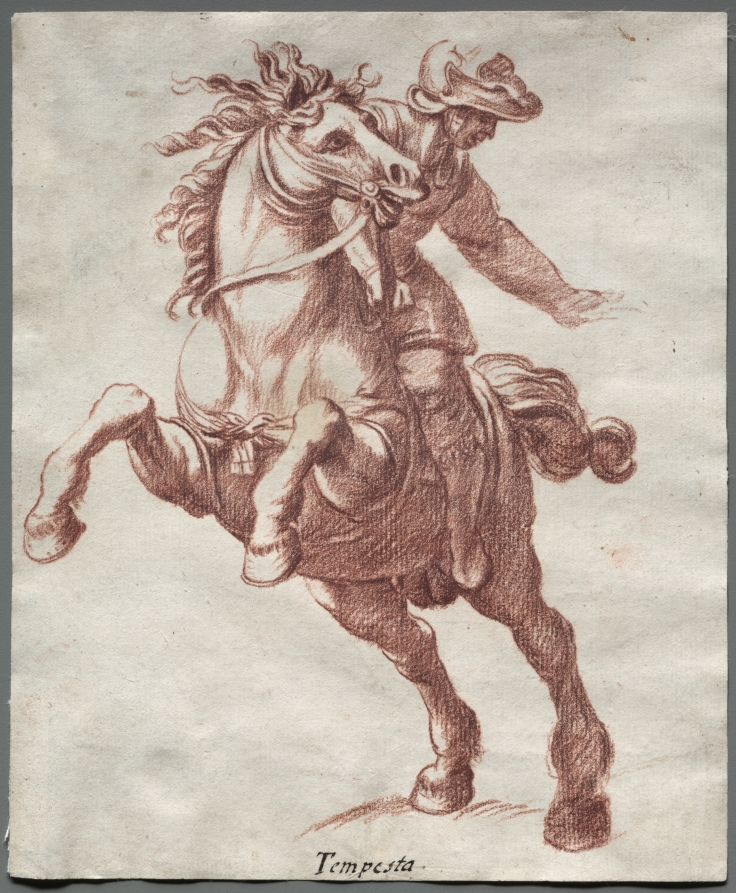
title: Rearing Horse and Rider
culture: Italy, late 16th-early 17th century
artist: attributed to Antonio Tempesta (Italian, 1555–1630)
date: c. 1600?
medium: red chalk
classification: Drawing